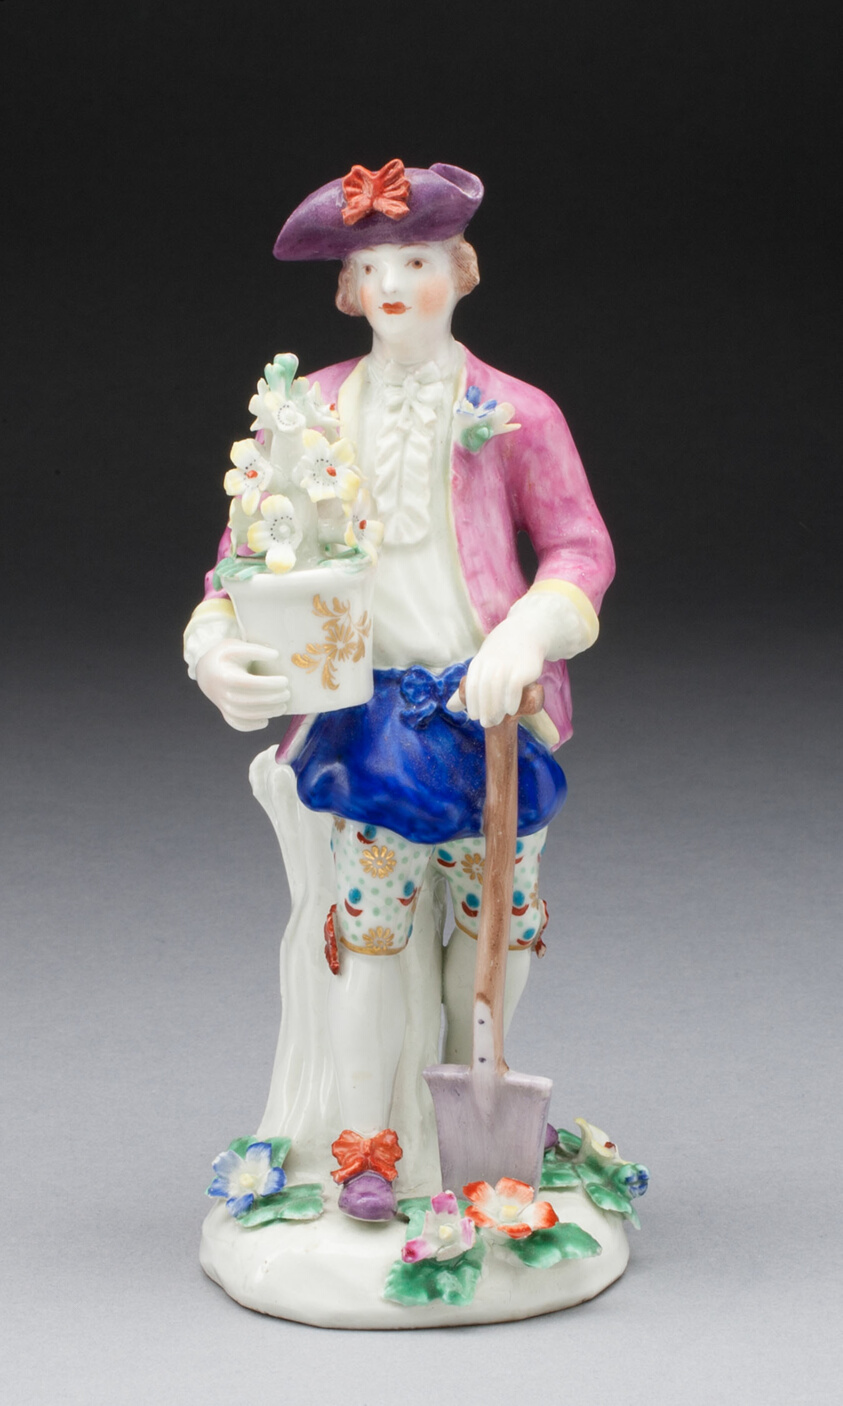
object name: Ceramics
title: Gardener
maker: Worcester Porcelain Factory (Warmstry House Period, 1751–1783); Worcester, England, founded 1751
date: 1760/70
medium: Soft-paste porcelain, polychrome enamels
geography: Worcester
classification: porcelain; sculpture; ceramics; european decorative arts